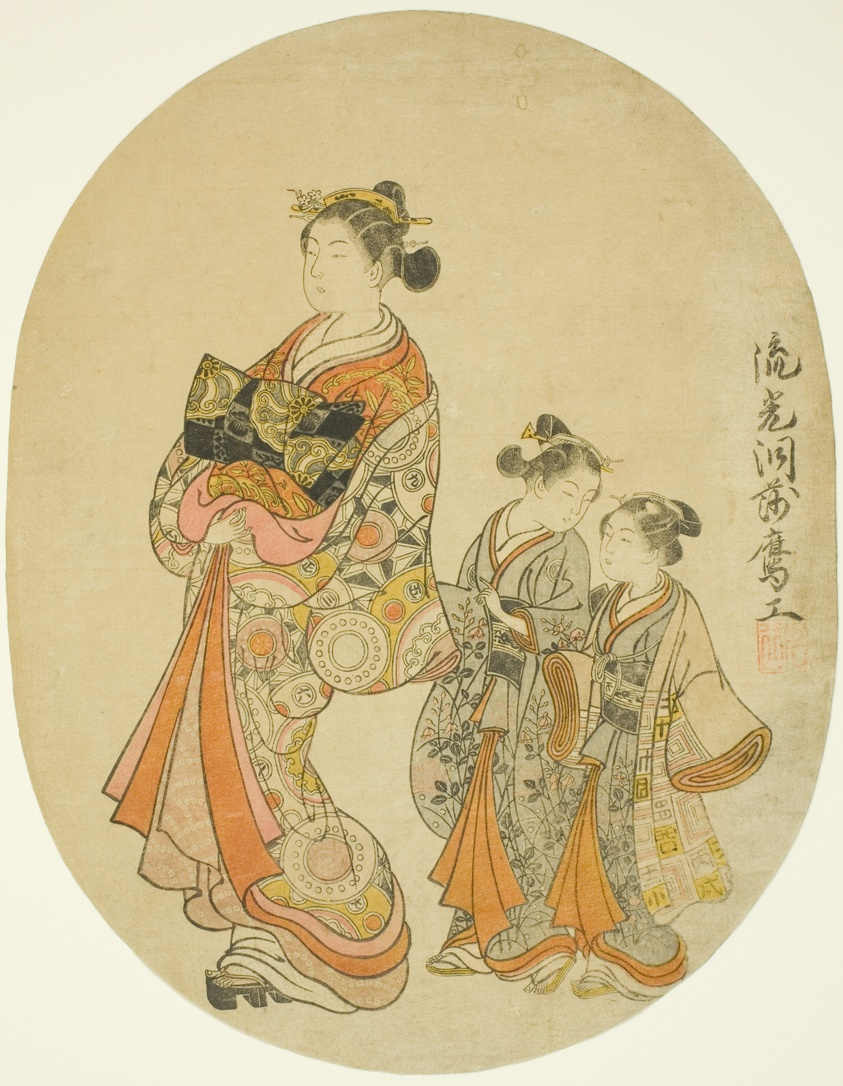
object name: Print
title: Courtesan and Two Kamuro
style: Japanese (culture or style)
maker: Komatsuya Hyakki (Japanese, 1720-1793 (?))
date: 1766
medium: Color woodblock print; chuban trimmed to an oval shape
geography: Japan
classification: woodblock print; print; asian art